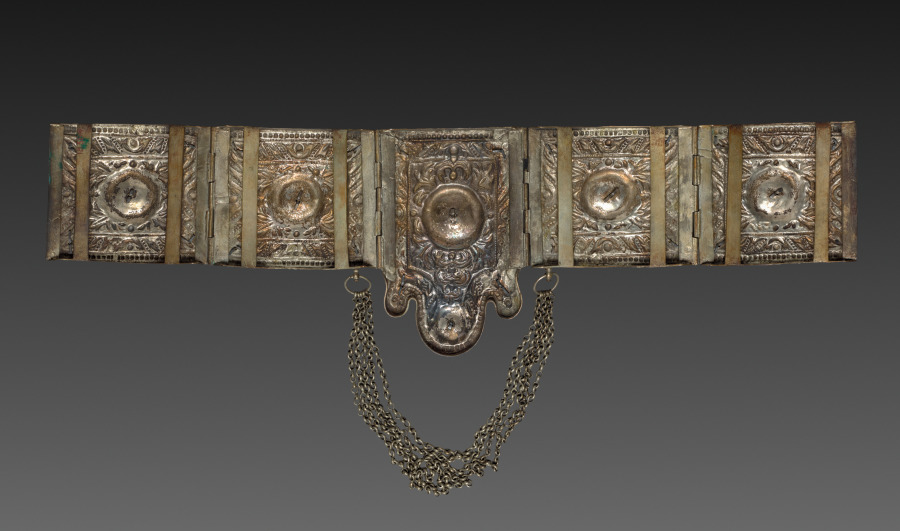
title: Belt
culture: Yugoslavia, Dalmatia, 19th century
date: 1800s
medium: silver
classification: Jewelry